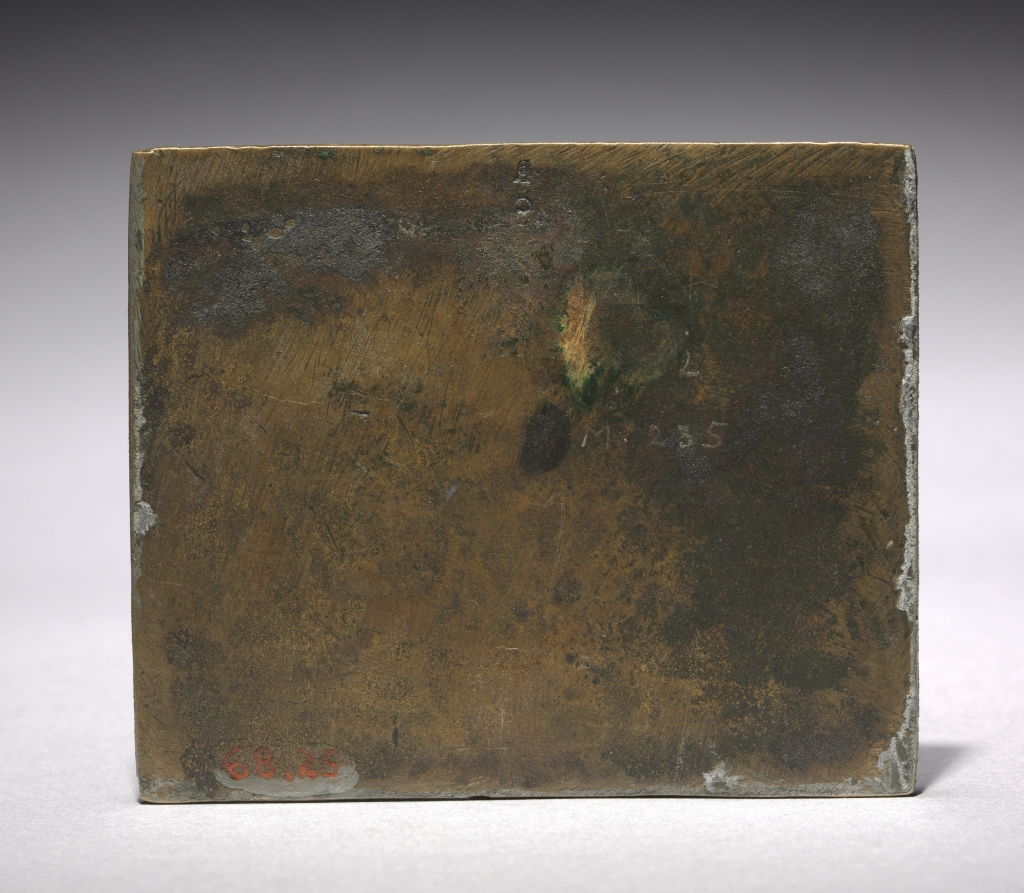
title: The Sacrifice of a Swine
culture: Italy, 16th century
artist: Andrea Riccio (Italian, c. 1470–1532)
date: c. 1520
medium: bronze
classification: Sculpture